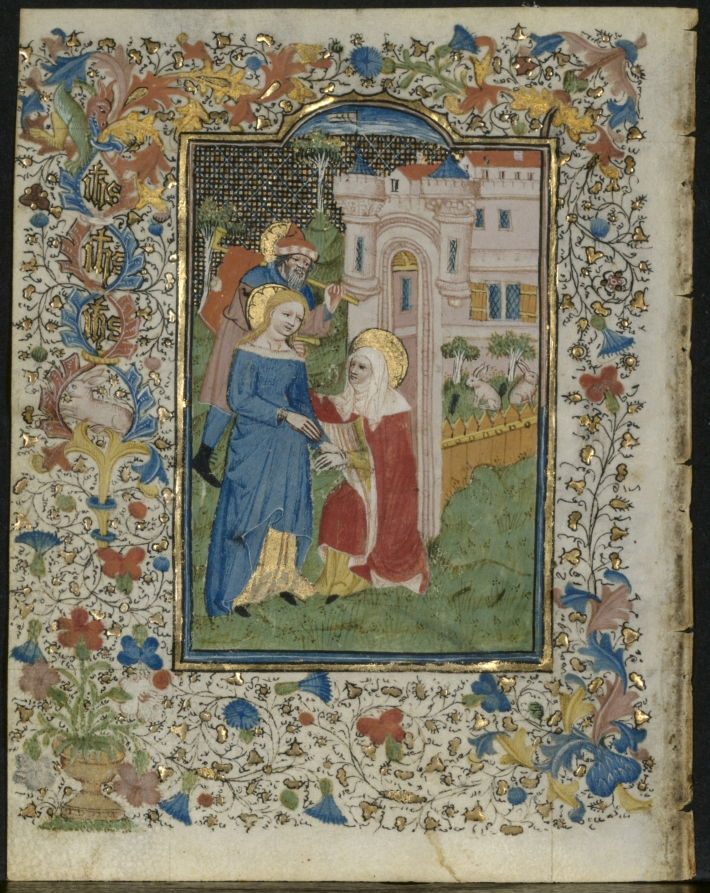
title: The Visitation: Leaf from a Book of Hours (5 of 6 Excised Leaves)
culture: France, 15th century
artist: Henri d'Orquevaulx (French)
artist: or Workshop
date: c. 1420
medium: ink, tempera and gold on vellum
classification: Manuscript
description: This leaf survives from what must have been an extraordinarily rich book of hours. Stylistically, the illuminations relate to the workshop of Henri d'Orquevaulx, a documented Metz manuscript painter. Little is known about d'Orquevaulx's life or career. Compositionally, structurally, and stylistically, the miniatures suggest strong links to Netherlandish illumination.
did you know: Originally used solely by the ordained, by the 1000s, these prayers had spread to the general population through their inclusion in books of hours.